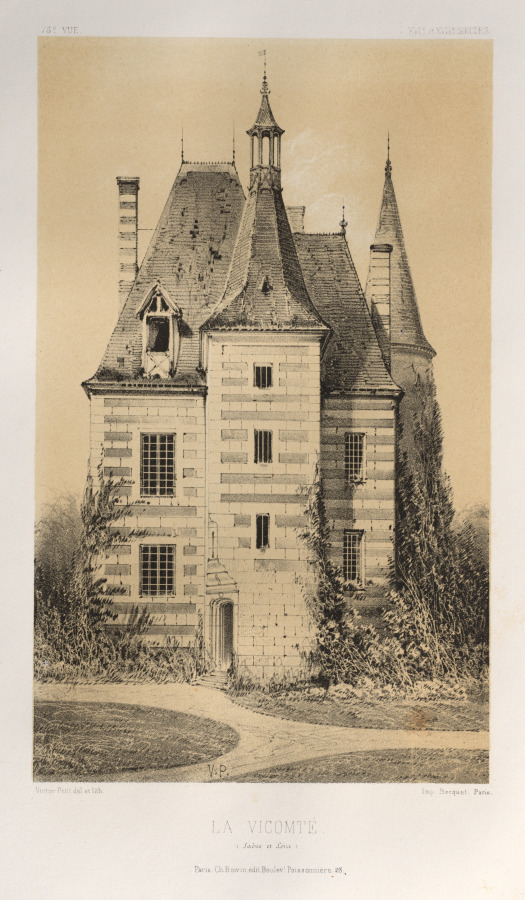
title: Architecture Pittoresque ou Monuments des XVeme. Et XVIeme. Siecles: Chateaux de France des XV et XVI Siecles: Pl. 75, La Vicomté (Saône et Loire)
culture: France, 19th century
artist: Victor Petit (French, 1817–1874)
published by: Charles Boivin (publisher and editor); Lith de Godard a Paris (printer)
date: 1860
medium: lithograph with tint stone, from portfolio of 100 lithographs with tint stone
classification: Print